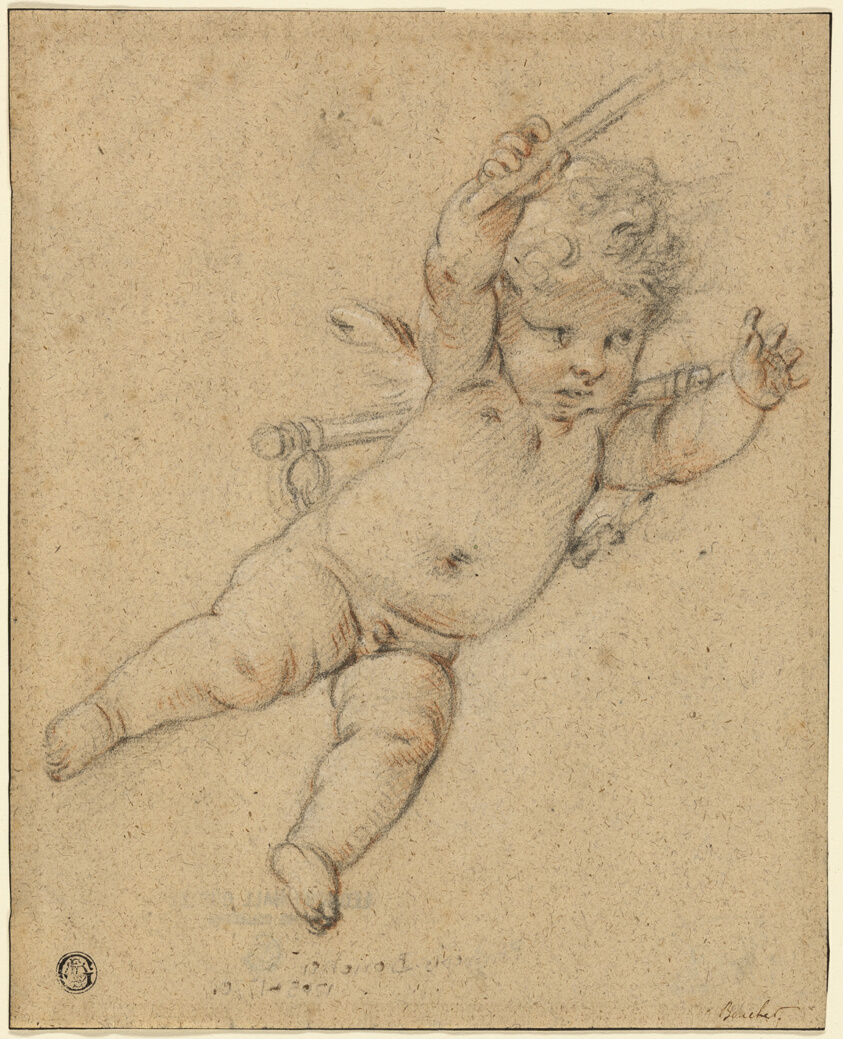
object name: Drawing and Watercolor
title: Flying Putto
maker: Studio or school of François Boucher; French, 1703-1770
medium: Red and black chalk, heightened with touches of white chalk, on buff laid paper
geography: France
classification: chalk; drawings (visual works); prints and drawing